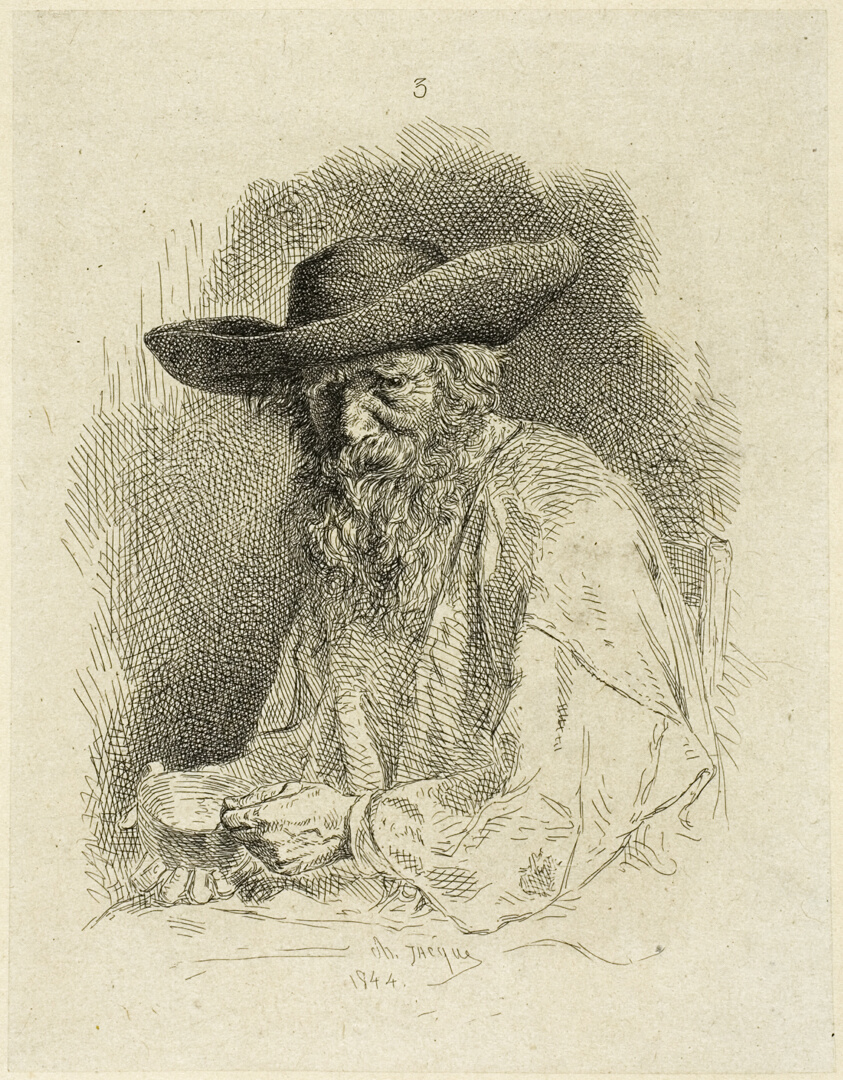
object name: Print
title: Old Man with Mess Tin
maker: Charles Émile Jacque (French, 1813-1894)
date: 1844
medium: Etching on light gray China paper laid down on cream wove paper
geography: France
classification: etching; print; prints and drawing